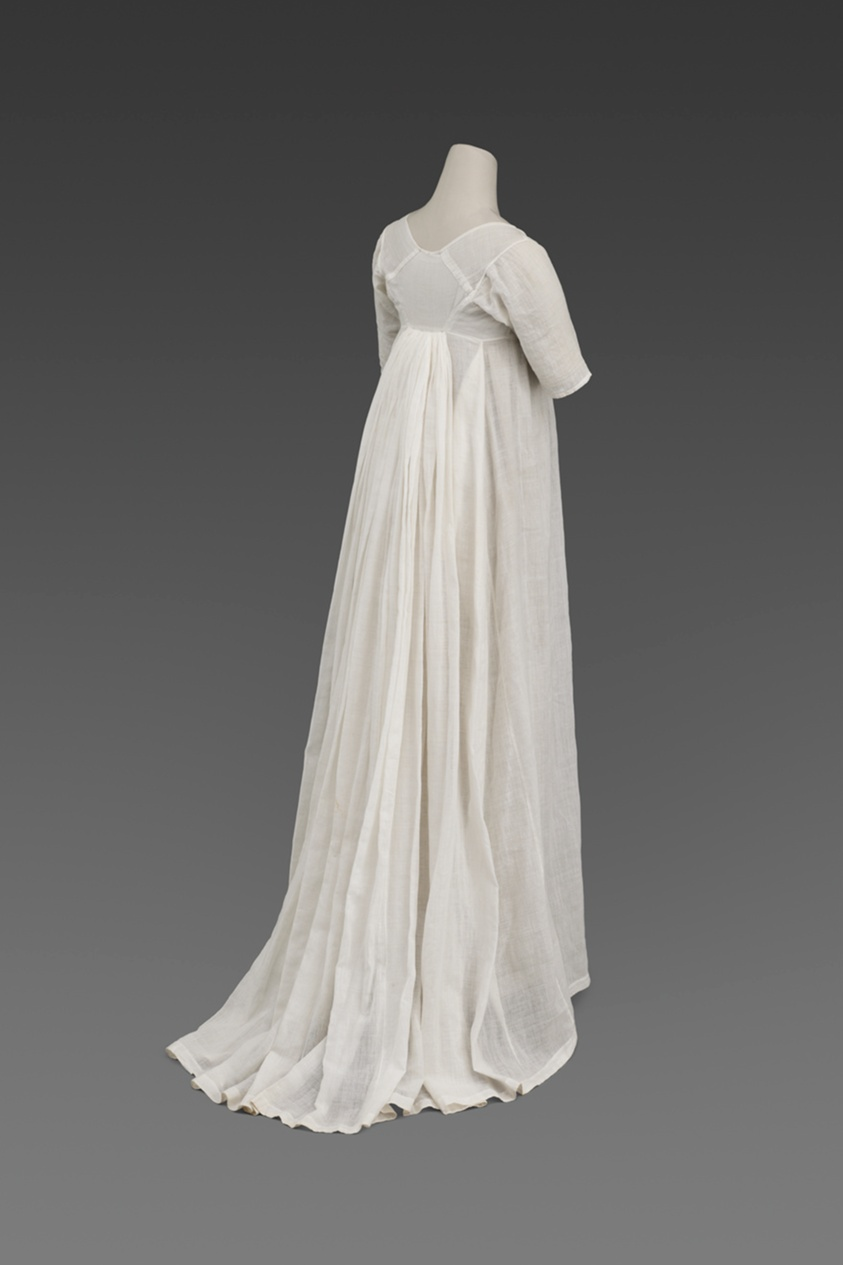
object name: Costume and Accessories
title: Woman's Day Dress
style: Neoclassicism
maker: Made in France with cotton imported from India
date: c. 1800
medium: Cotton, hand-spun, hand-woven plain weave called mulmul or muslin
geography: India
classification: costume; dress (garment); clothing; garment; textile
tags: dresses, fashion, garment, clothing, costume